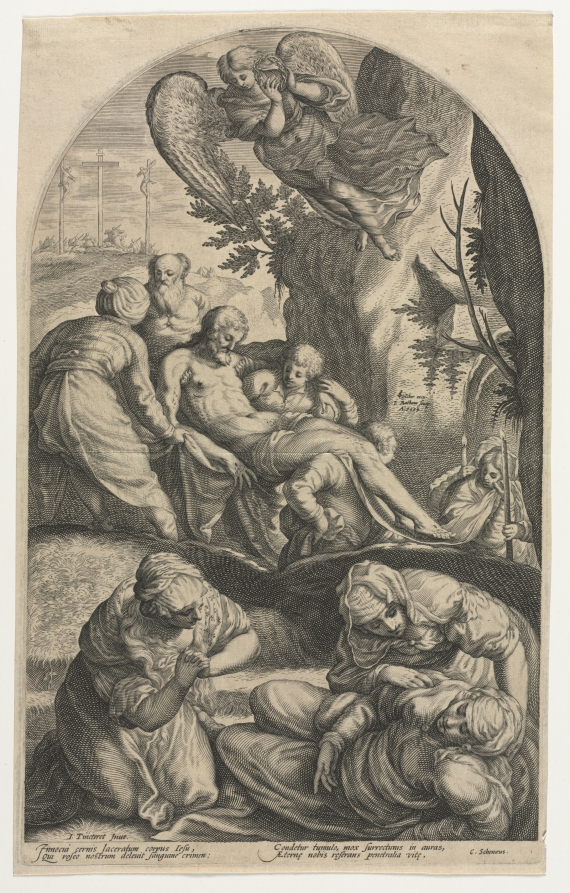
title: The Disciples of Christ Carrying His Body to the Tomb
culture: Netherlands, late 16th Century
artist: Jacob Matham (Dutch, 1571–1631)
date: 1594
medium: engraving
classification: Print